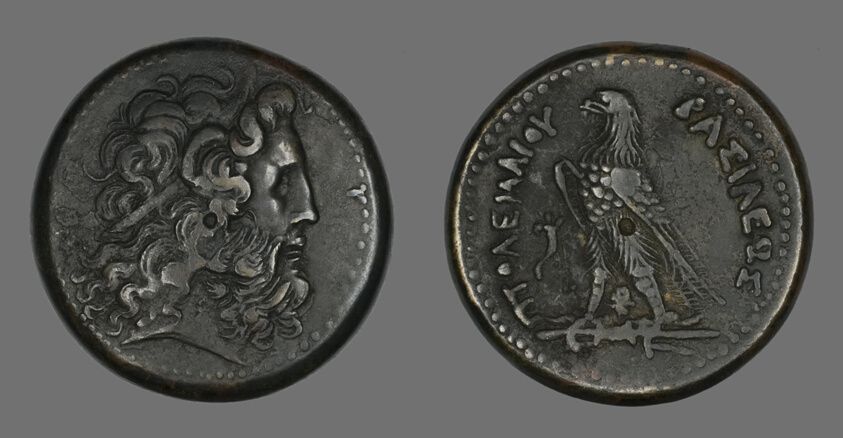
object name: Coin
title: Coin Depicting the God Zeus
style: ptolemaic, greco-roman (egyptian)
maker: Greek, minted in Alexandria, Egypt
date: 247-222 BCE, issued by Ptolemy III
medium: Bronze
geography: Ancient Greece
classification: coin; ancient art; struck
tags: zeus